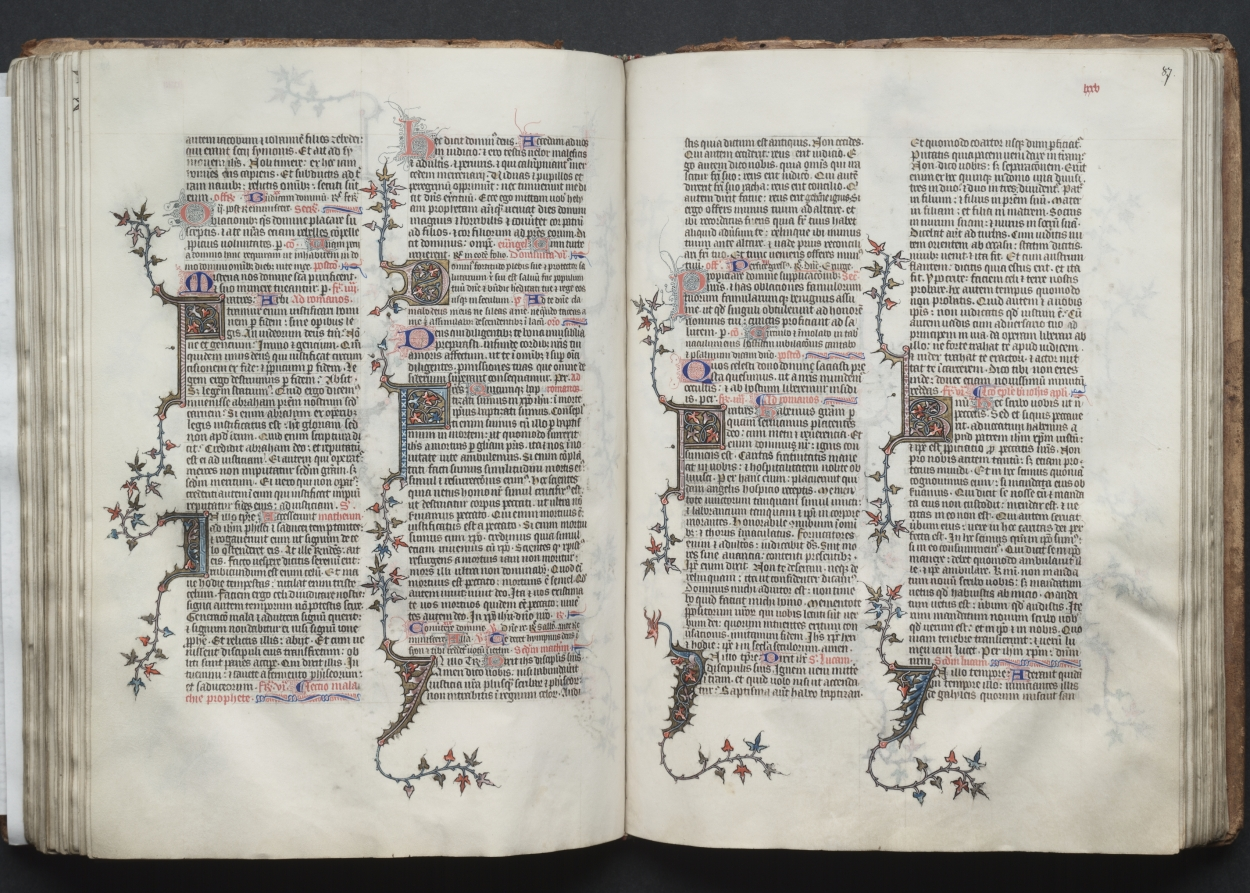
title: The Gotha Missal: Fol. 87r, Text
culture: France, Paris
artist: Master of the Boqueteaux (French)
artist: and Workshop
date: c. 1375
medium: ink, tempera, and gold on vellum; blind-tooled leather binding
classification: Bound Volume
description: The style and quality of this manuscript's decoration is typical of deluxe Parisian books made for aristocratic or royal patrons. Most of the book's decoration appears to be the work of the Master of the Boqueteaux, an artist active at the court of King Charles V (died 1380). His style was apparently shared by a number of book illuminators working in and around Paris. It is very possible that the Gotha Missal belonged to Charles V, but is not provable because the manuscript has no royal portraits and lacks a colophon. Given the book's magnificent decoration, however, it would seem that it was produced for a Valois prince, if not for the king himself. The manuscript receives its name from the German dukes of Gotha, its later owners.